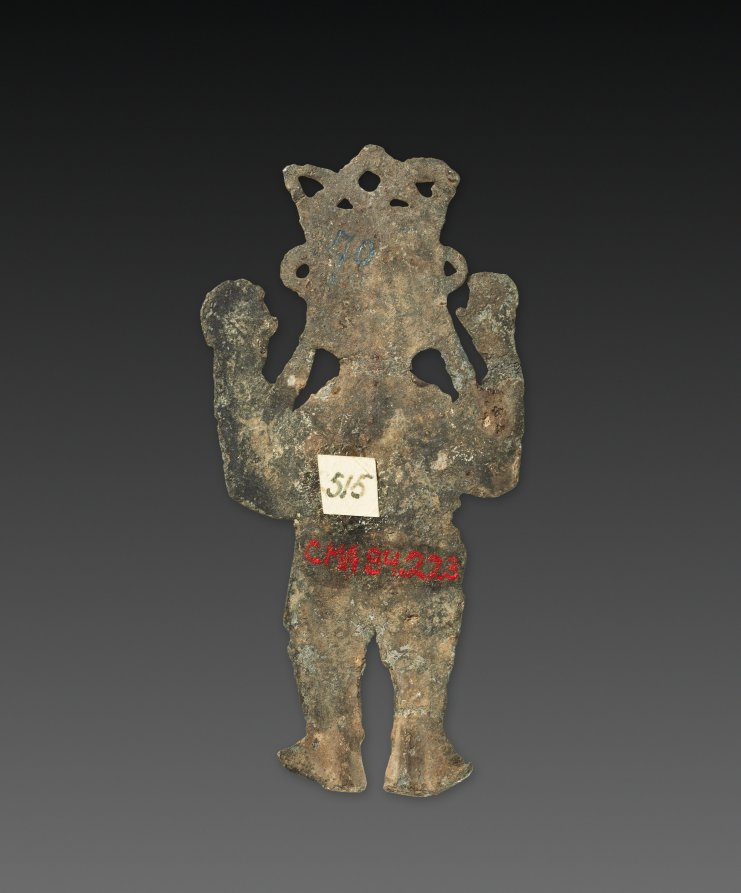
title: Orans Figure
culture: Iran, Medieval Period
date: before 1984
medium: lead relief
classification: Sculpture